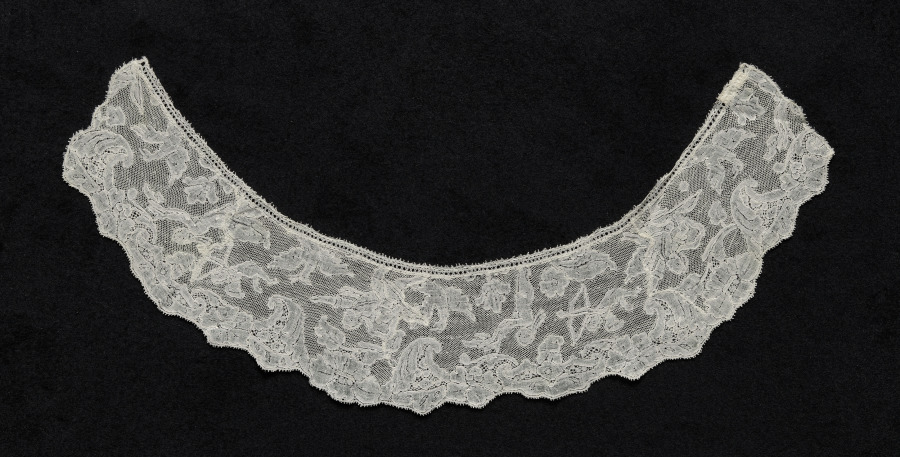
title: Lace Collar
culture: Belgium, Mechelen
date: 1700s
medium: Linen: bobbin lace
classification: Lace